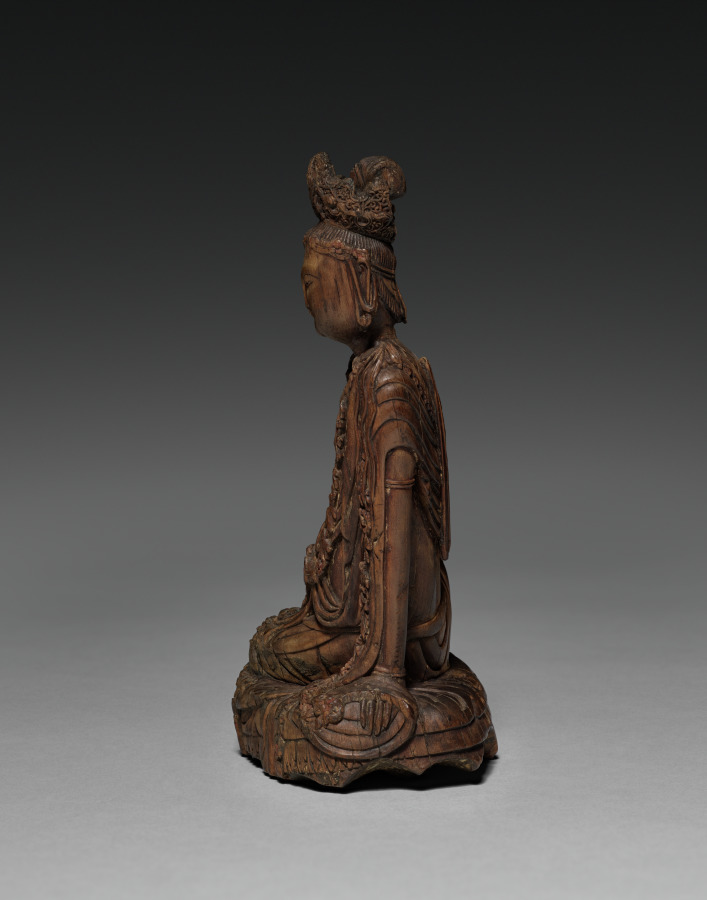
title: Potalaka Guanyin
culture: China, Five dynasties (907-960)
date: 900s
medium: Carved sandalwood with traces of paint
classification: Sculpture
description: This portable figure of Guanyin, the Bodhisattva of Compassion who vowed to stay on earth to help human beings, is carved of precious sandalwood. It is lavishly covered with garlands of flowers that retain traces of the original red paint. The small sculpture may have been used in a private devotional context.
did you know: Mount Potala is the mythical home of the bodhisattva Avalokiteśvara, called Guanyin in Chinese.